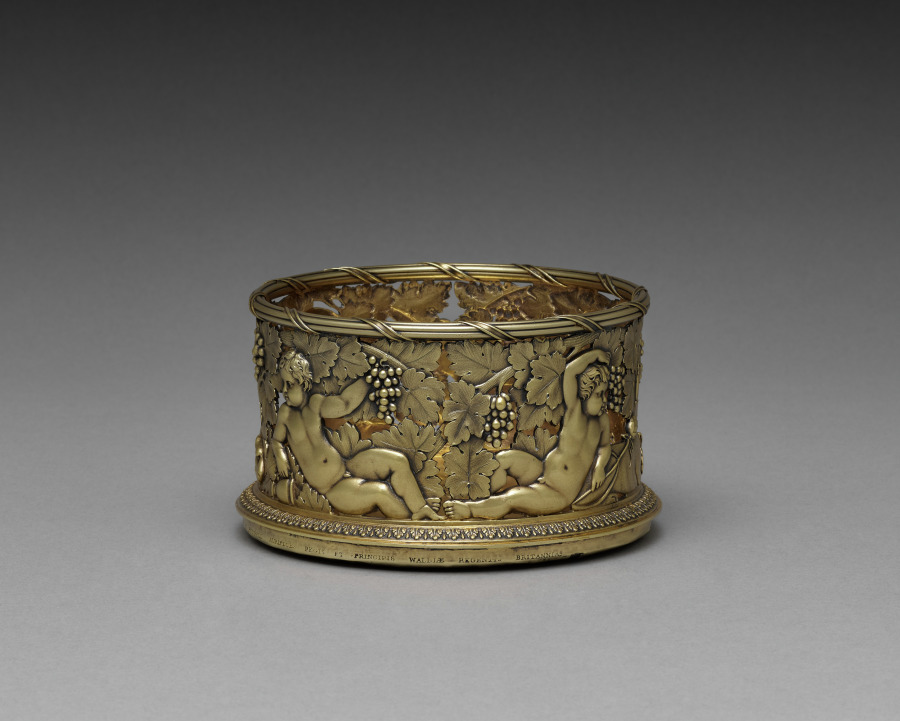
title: Decanter Stand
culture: England, London, 19th century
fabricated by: Paul Storr (British, 1771–1844)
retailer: Rundell, Bridge and Rundell (British, 1797–1834)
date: 1814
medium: silver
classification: Silver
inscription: Engraved on rim of base: "RUNDELL BRIDGE ET RUNDELL AURIFICES REGIS ET PRINCIPIS WALLIAE REGENTIS BRITANNIAS." Engraved on base of interior: Unidentifiable crest with bird over other animal.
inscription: Scratched on rim of base: "6625"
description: Decanter stands served as coasters for glass wine bottles in order to protect the extremely expensive and fragile linen tablecloths they sat upon. This example contains depictions of large grape vines and youthful figures that evoke the Roman god of wine, Bacchus (or Dionysus in Greek mythology). One of the young boys grasps an empty drinking vessel while the other leans against a panther, the frequent companion of Bacchus.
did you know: Bacchanal motifs of grapes and consumption echo this object’s function as a stand for a wine decanter.